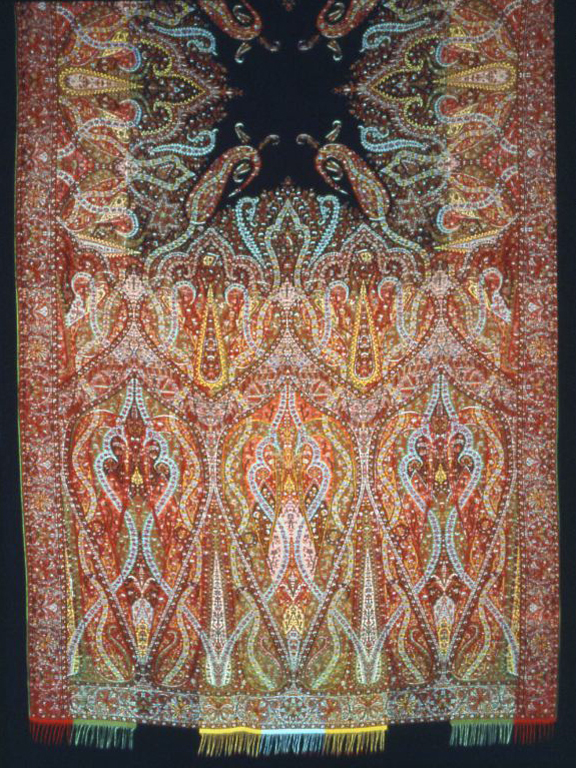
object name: Textile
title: Long Shawl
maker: France or Scotland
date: 1845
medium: Wool and cotton, warp threads dyed in multiple colors prior to weaving; center of weft-float faced 1:2 'Z' twill weave; patterned areas of warp-float faced 2:1 'Z' twill weave with supplementary patterning wefts bound in weft-float faced 1:2 'Z' twill interlacings; main warp fringe; woven on loom with Jacquard attachment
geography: France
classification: textile; weaving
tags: fashion